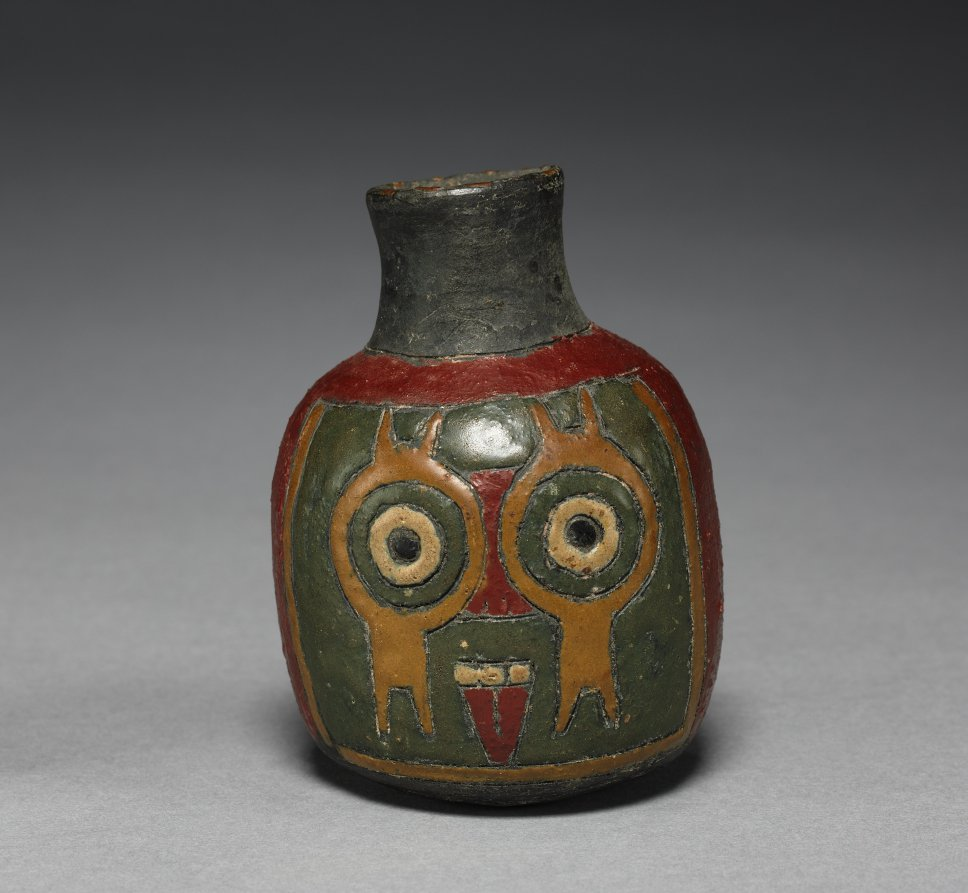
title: Small Bottle with Feline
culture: Peru, South Coast, Paracas (Cavernas) style (700 BCE–1 CE)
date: 700–1 BCE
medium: earthenware, resin-based paint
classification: Ceramic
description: Little is known of the meaning of the beautifully abstracted felines so often incised on Paracas ceramics. The designs achieve much of their complexity through color applied as resin-based paint after the vessel was fired in a smoky atmosphere that blackened its surface.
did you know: Small, wild, reclusive felines, pampas cats live on the margins of agricultural fields, where they prey on rodents and other pests that are a farmer’s bane.